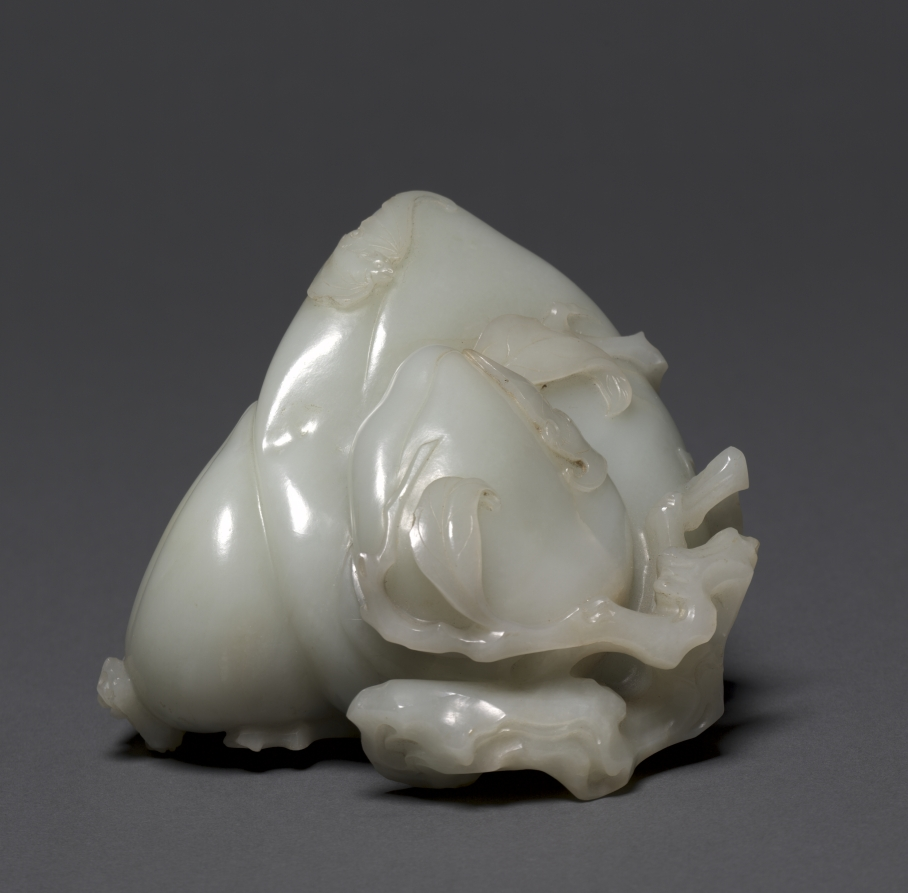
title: Peaches and Bats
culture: China, Qing dynasty (1644–1911)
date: late 1600s–1700s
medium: greenish-white jade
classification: Jade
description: This white jade is carved as a double peach with realistically detailed leaves and branch following the curve of the jade. Clinging to the edge are a pair of bats, which represent good fortune.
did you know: This jade sculpture was given to the museum in memory of John D. Rockefeller and his family.